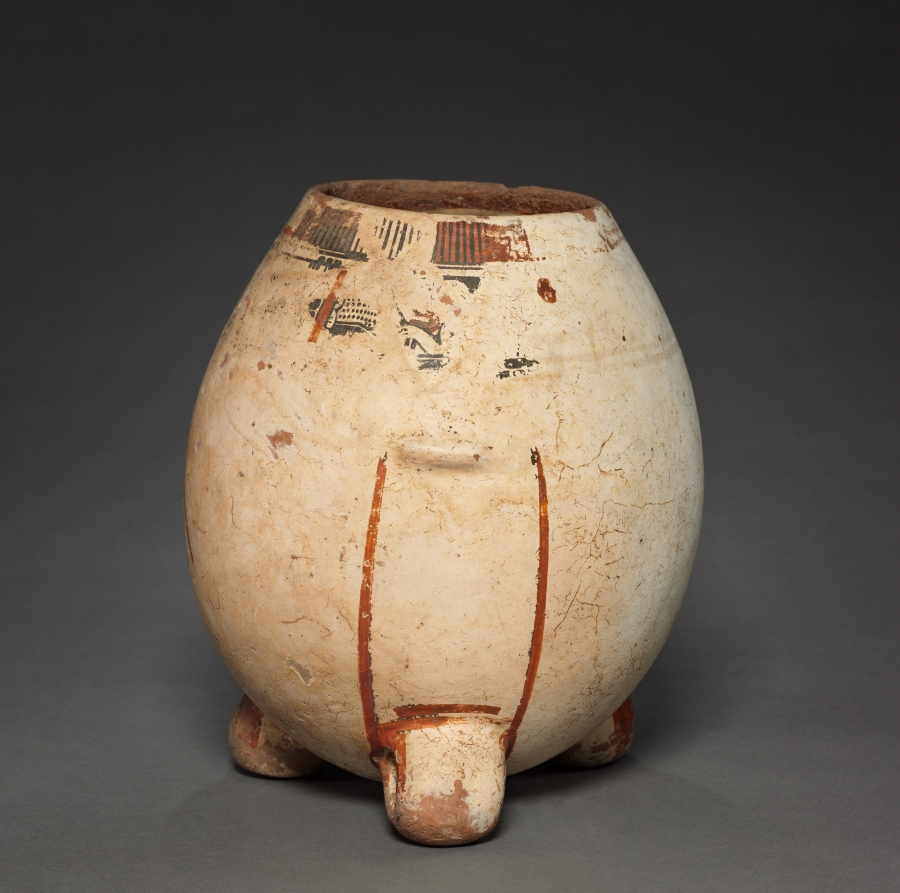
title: Footed Vase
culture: Costa Rica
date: 1000–1550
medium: earthenware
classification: Ceramic